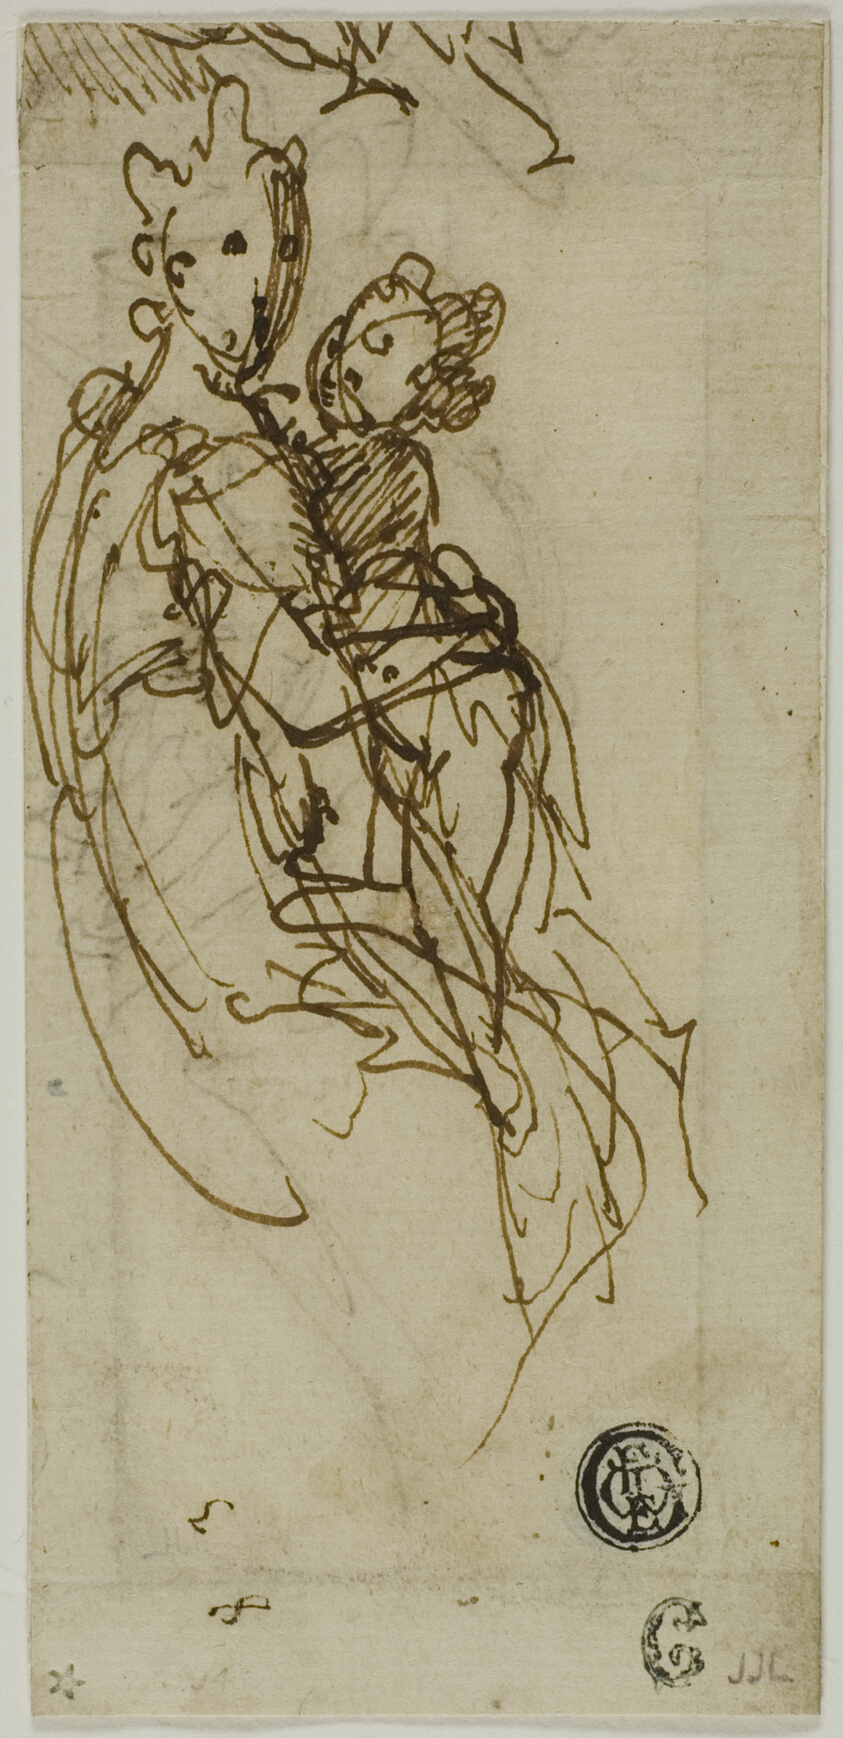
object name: Drawing and Watercolor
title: Seated Virgin and Child (recto); Seated Virgin and Child (verso)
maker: Bernardino India (Italian, 1528-1590)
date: 1570/90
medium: Pen and brown ink (recto and verso) on cream laid paper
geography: Italy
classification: pen and ink drawings; drawings (visual works); prints and drawing